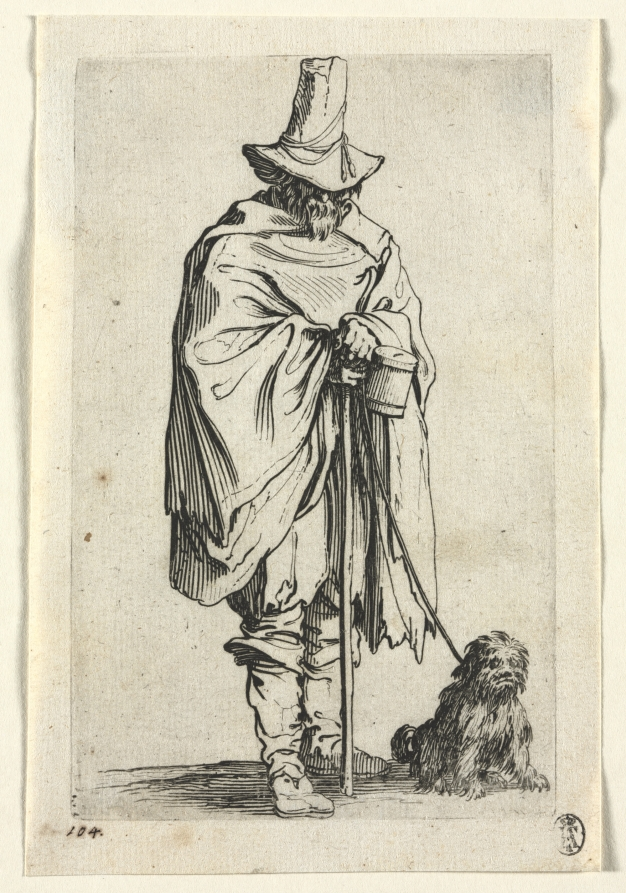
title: The Beggars: Blind Man with His Dog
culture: France, 17th century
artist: Jacques Callot (French, 1592–1635)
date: c. 1623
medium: etching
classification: Print